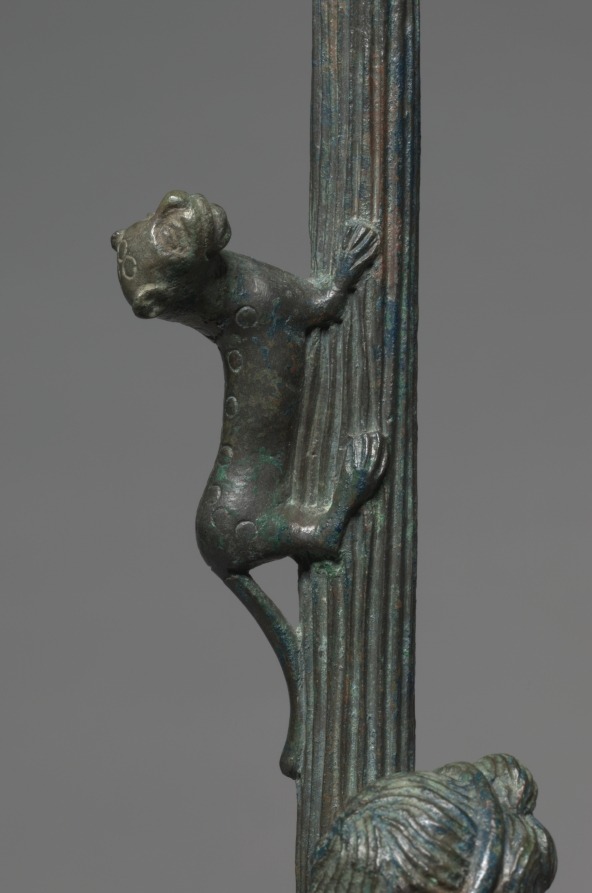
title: Incense Burner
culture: Etruscan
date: 100s BCE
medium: bronze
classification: Metalwork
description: Both elaborate and functional, the Etruscan thymiaterion, or incense burner, typically comprises at least three main parts—tripod stand, shaft, and, at the top, a shallow bowl for incense. Often, a figural support is incorporated, here in the form of a youthful male nude, perhaps the wine god Dionysos. Below him, the tripod stand features cloven hoofs, while above him a spotted cat or panther climbs toward a rooster or other crested bird. Holes in each corner of the square upper plate likely held additional animals or other ornaments.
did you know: The circular depression on the top of this object likely held incense.